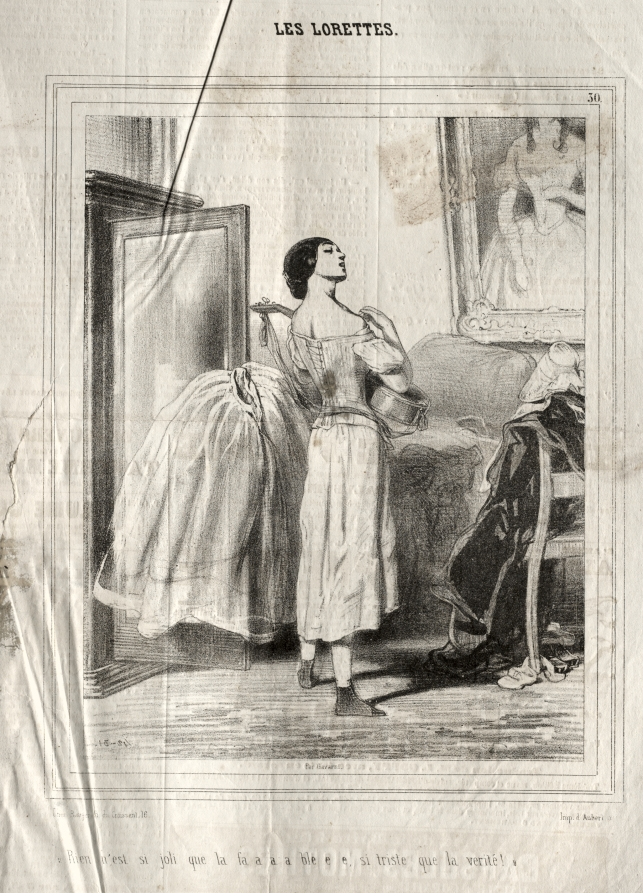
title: Les Lorettes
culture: France, 19th century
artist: Paul Gavarni (French, 1804–1866)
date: 1842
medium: lithograph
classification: Print